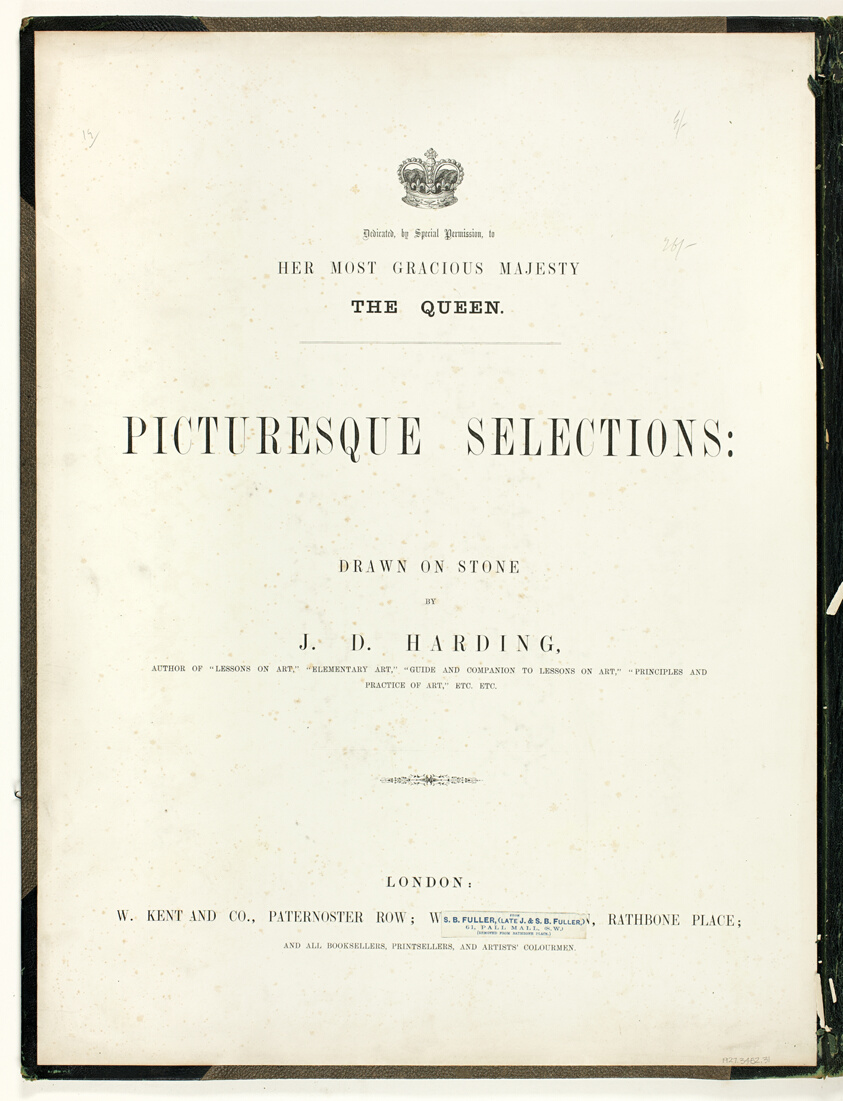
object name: Print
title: Picturesque Selections: Text Page, from Picturesque Selections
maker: James Duffield Harding, (English, 1798-1863); Published by W. Kent and Co.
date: c. 1860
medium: Letterpress on paper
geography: England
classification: letterpress; print; prints and drawing